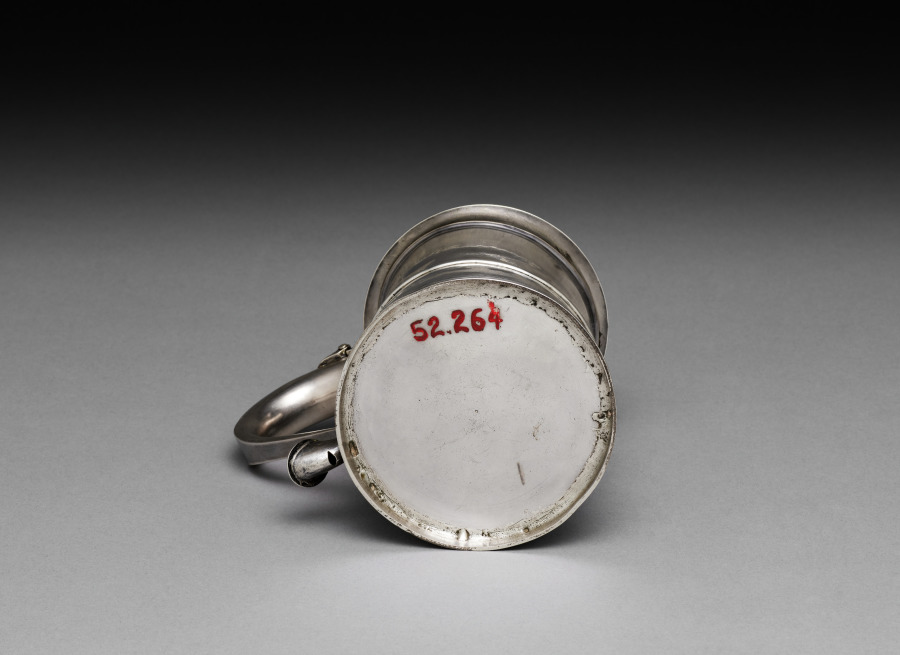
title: Tankard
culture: America, Massachusetts, Boston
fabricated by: Edward Winslow (American, 1669–1753)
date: c. 1725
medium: silver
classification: Silver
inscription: Engraved on handle: "R" over "I + D"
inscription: Stamped on side: "EV"